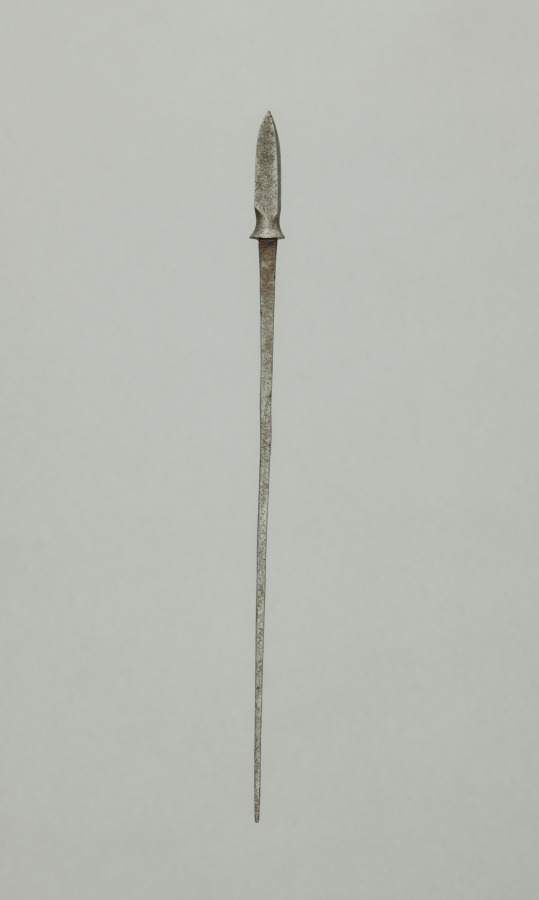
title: Arrow Point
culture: Japan, Edo period (1615–1868)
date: 1700s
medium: steel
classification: Arms and Armor